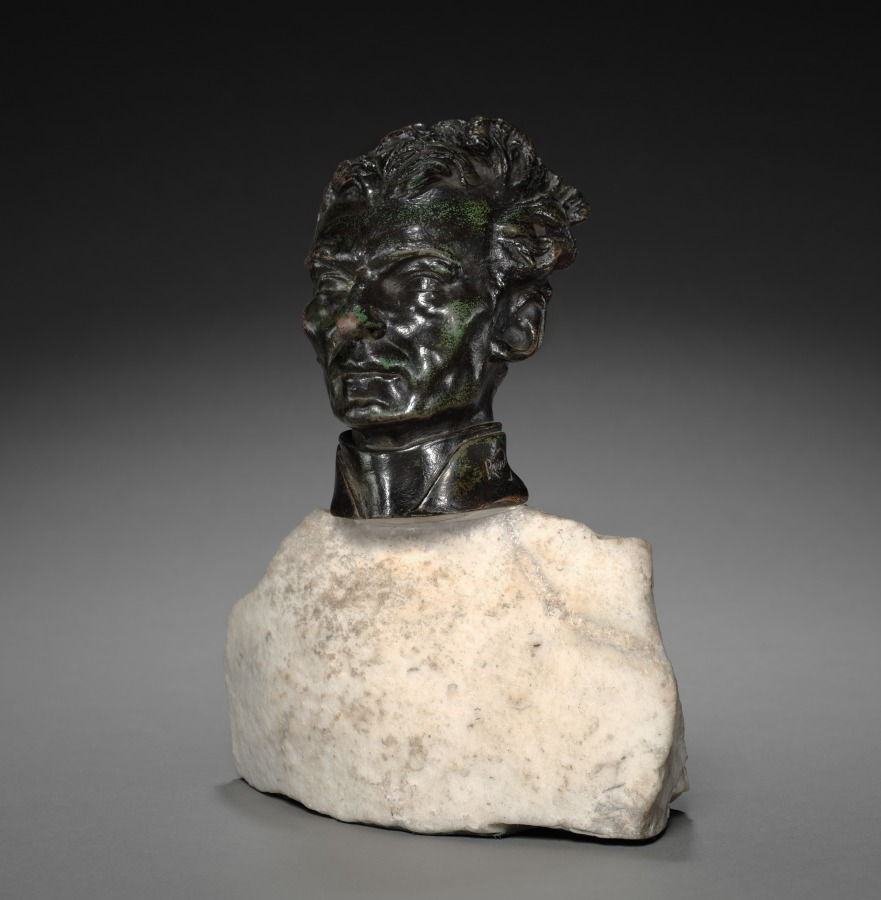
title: Father Pierre-Julien Eymard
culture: France, 19th century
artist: Auguste Rodin (French, 1840–1917)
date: ca. 1863 (original model)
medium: bronze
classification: Sculpture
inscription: Signed on left side of collar: "Rodin"; on base, back right: "A. Rodin"